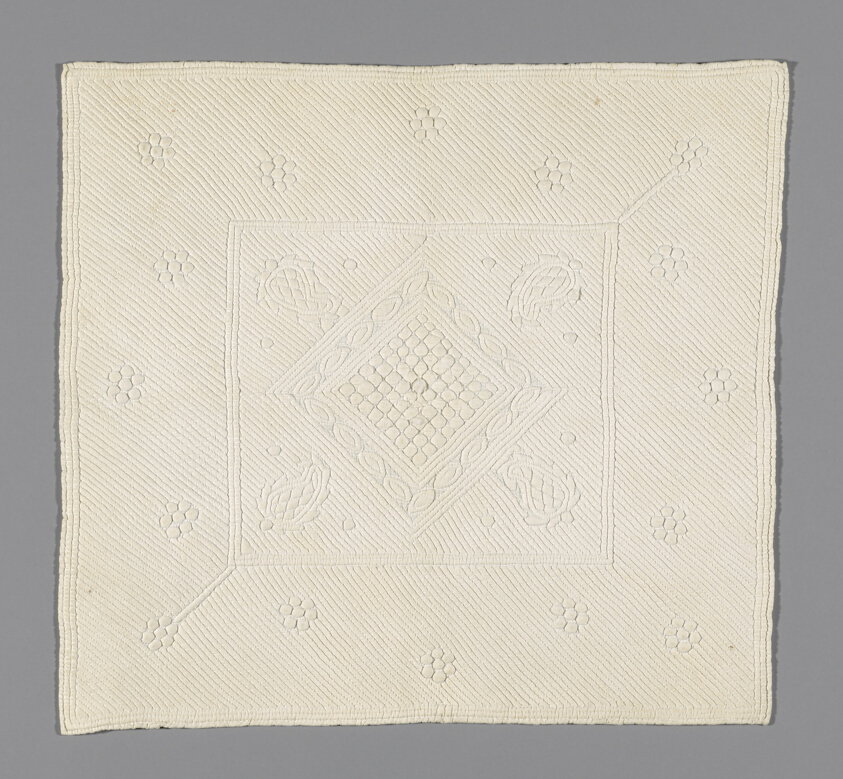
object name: Textile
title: Pillow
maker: France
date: 1825/75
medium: Cotton, plain weave; quilted; cotton batting; lined with cotton, plain weave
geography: France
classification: textile; needlework (visual works)